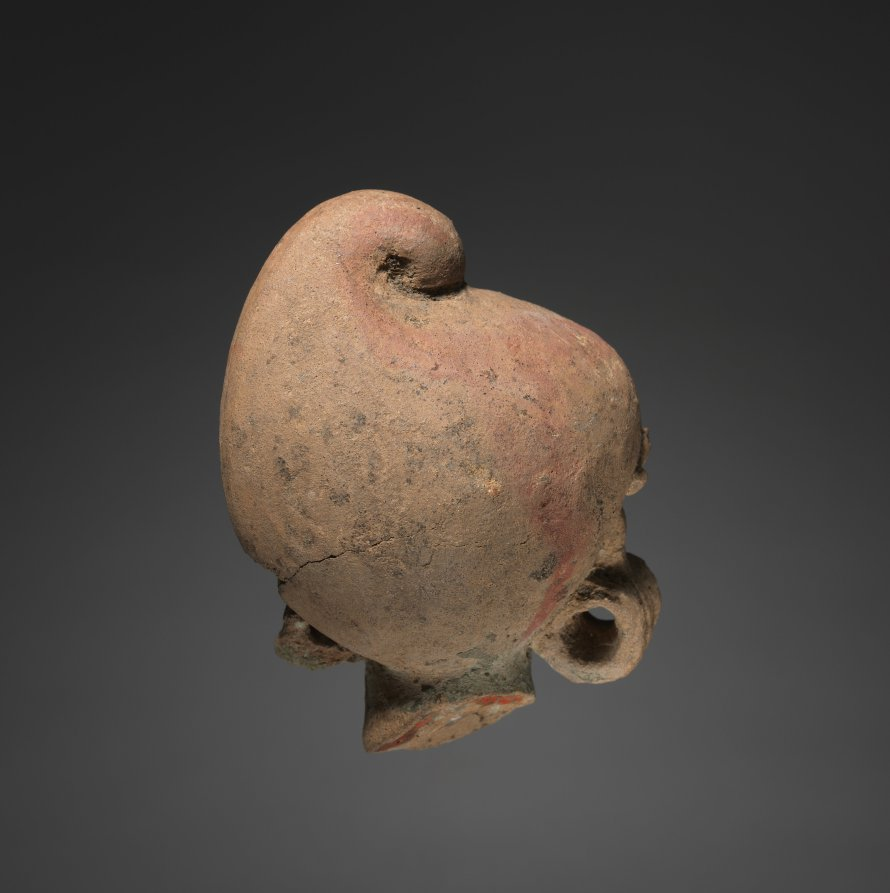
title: Female Head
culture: Eastern Java, Majapahit Dynasty (1293-1478)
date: Majapahit Dynasty (1293–1478)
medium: terracotta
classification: Sculpture